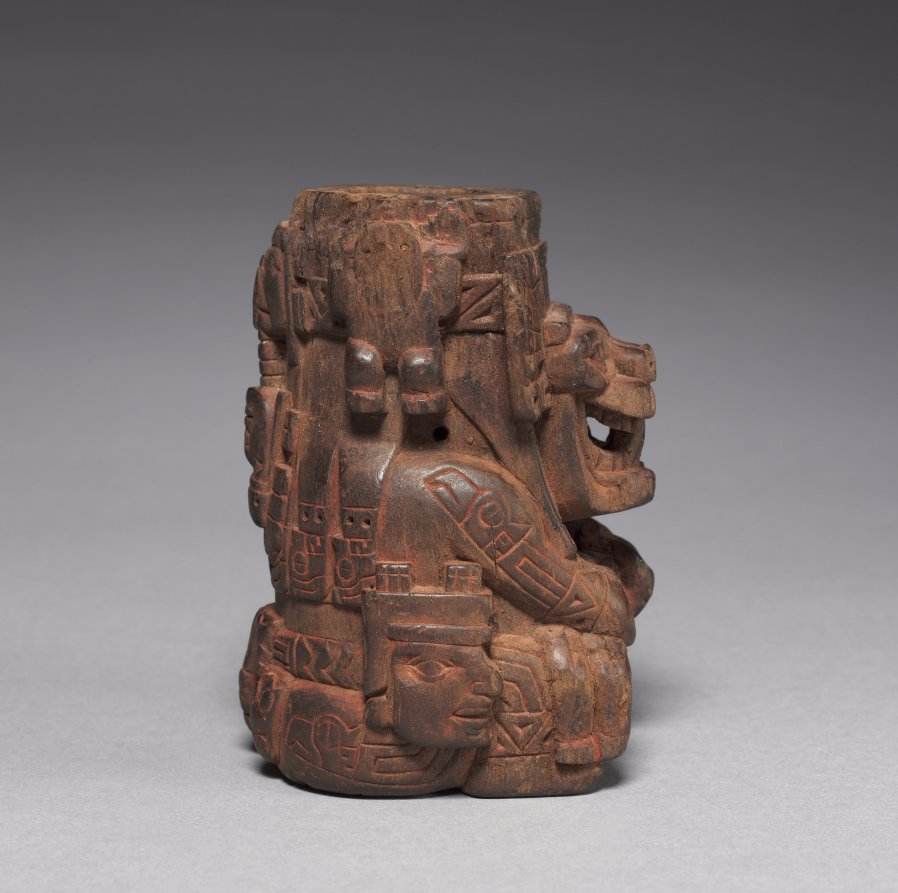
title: Sacrificer Container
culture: Central Andes, Wari style (600-1000)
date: 770–890 (radiocarbon date, 95% probability)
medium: wood and cinnabar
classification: Wood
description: This container assumes the shape of a magnificent, feline-headed, supernatural sacrificer who draws a knife across the throat of the human it holds in its lap. Severed human heads hang from the feline's belt and dangle by the trachea at the back of its headdress. Sacrifice had a place in Wari religious practice, probably as an unusual and exceptionally precious offering made to entice the benevolence of cosmic forces. Indeed, colonial-period Andean people believed that death was a prerequisite for the renewal of the world.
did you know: Traces of cinnabar, a toxic mercuric sulfide, are visible on the container's surface.